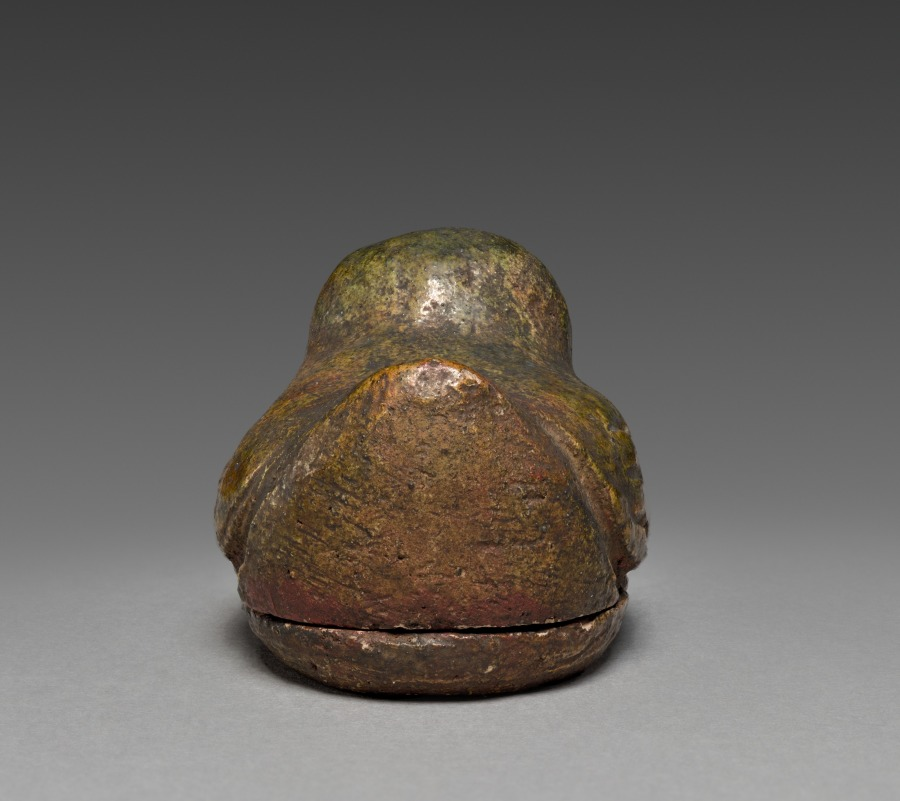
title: Incense Container (Kōgō) in the Shape of a Bird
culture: Japan, Edo period (1615–1868)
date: c. 1700–1868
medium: Stoneware with glaze and carved decoration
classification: Ceramic